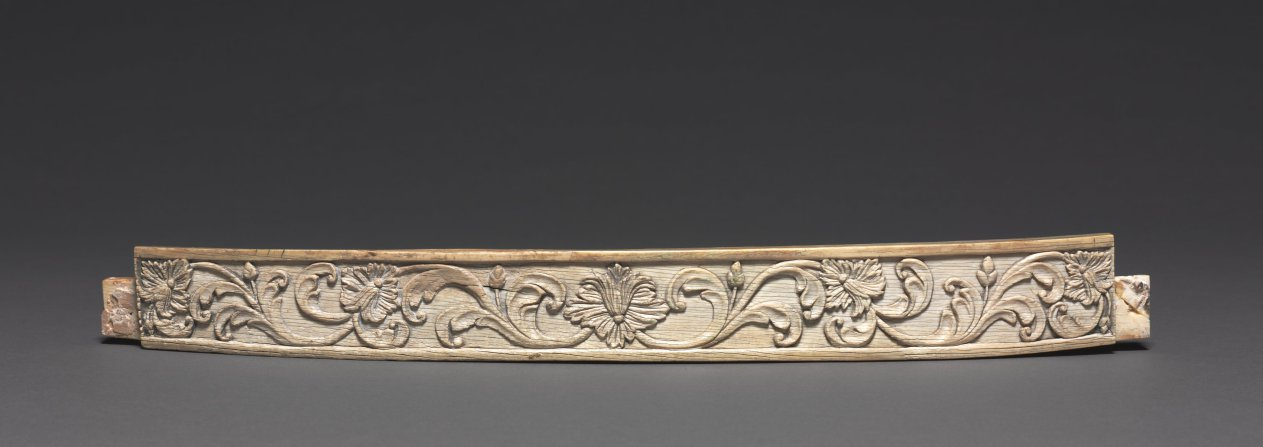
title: Panel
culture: India, Mughal dynasty (1526-1756)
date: 1600s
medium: ivory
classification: Ivory